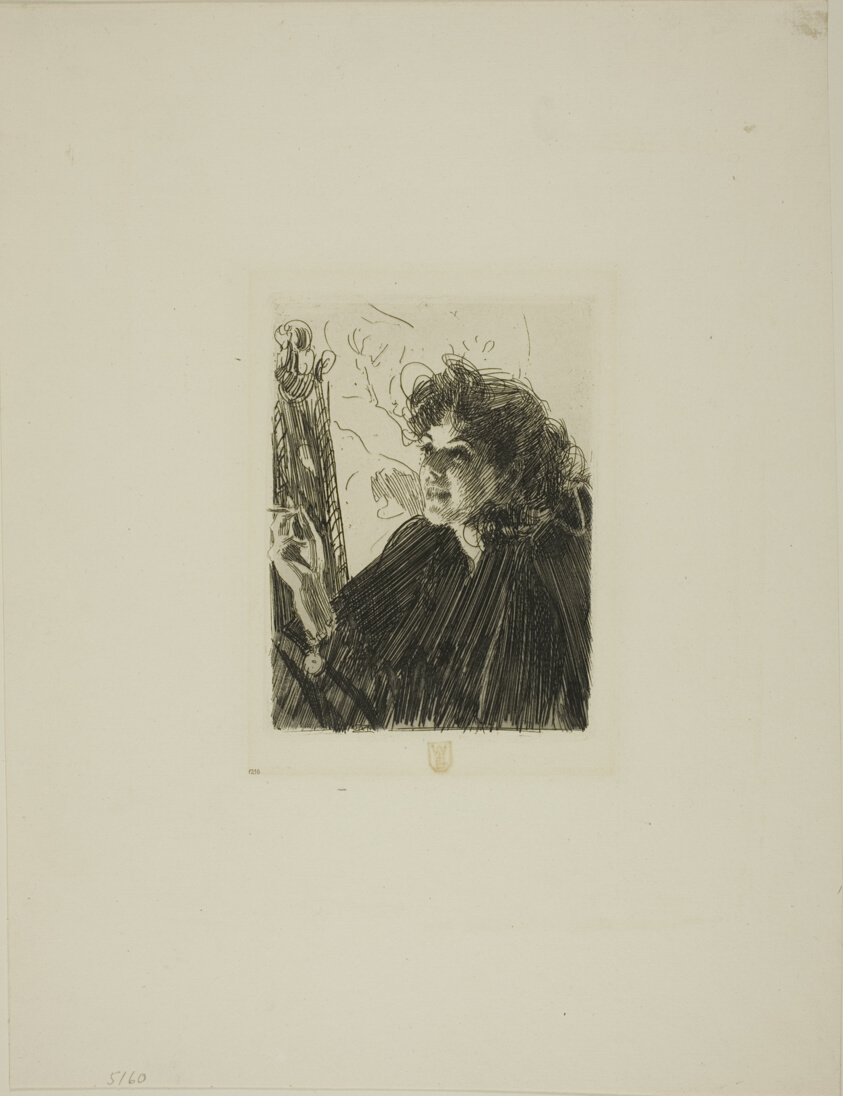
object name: Print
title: Girl with a Cigarette II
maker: Anders Zorn (Swedish, 1860-1920)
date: 1891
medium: Etching on ivory laid paper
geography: Sweden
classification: etching; print; prints and drawing